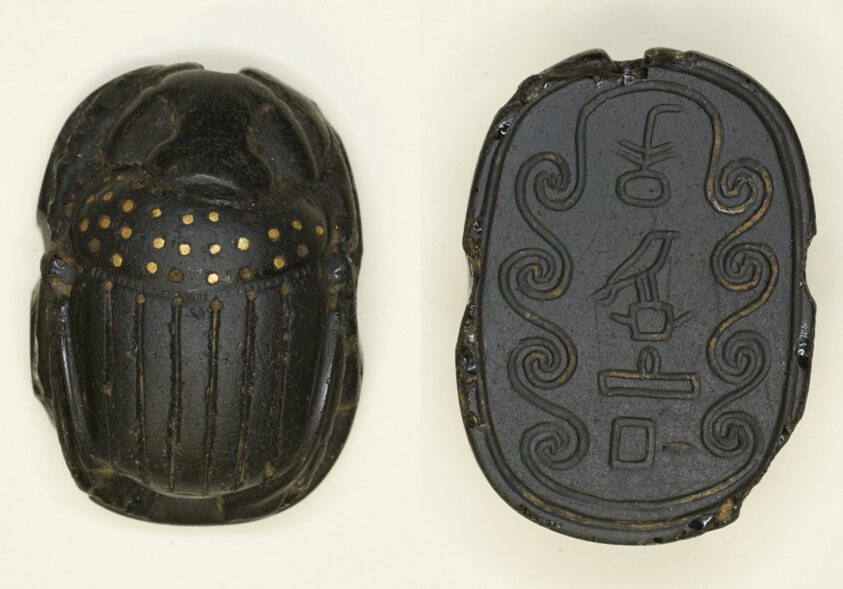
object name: Costume and Accessories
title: Scarab: Title and Personal Name (?)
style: middle kingdom, egyptian, ancient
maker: Egyptian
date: Middle Kingdom, Dynasties 11–14 (about 2055–1650 BCE)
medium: Stone and gold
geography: Egypt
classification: scarab; stone; ancient art; costume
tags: Hieroglyphs, insects, swirl motifs